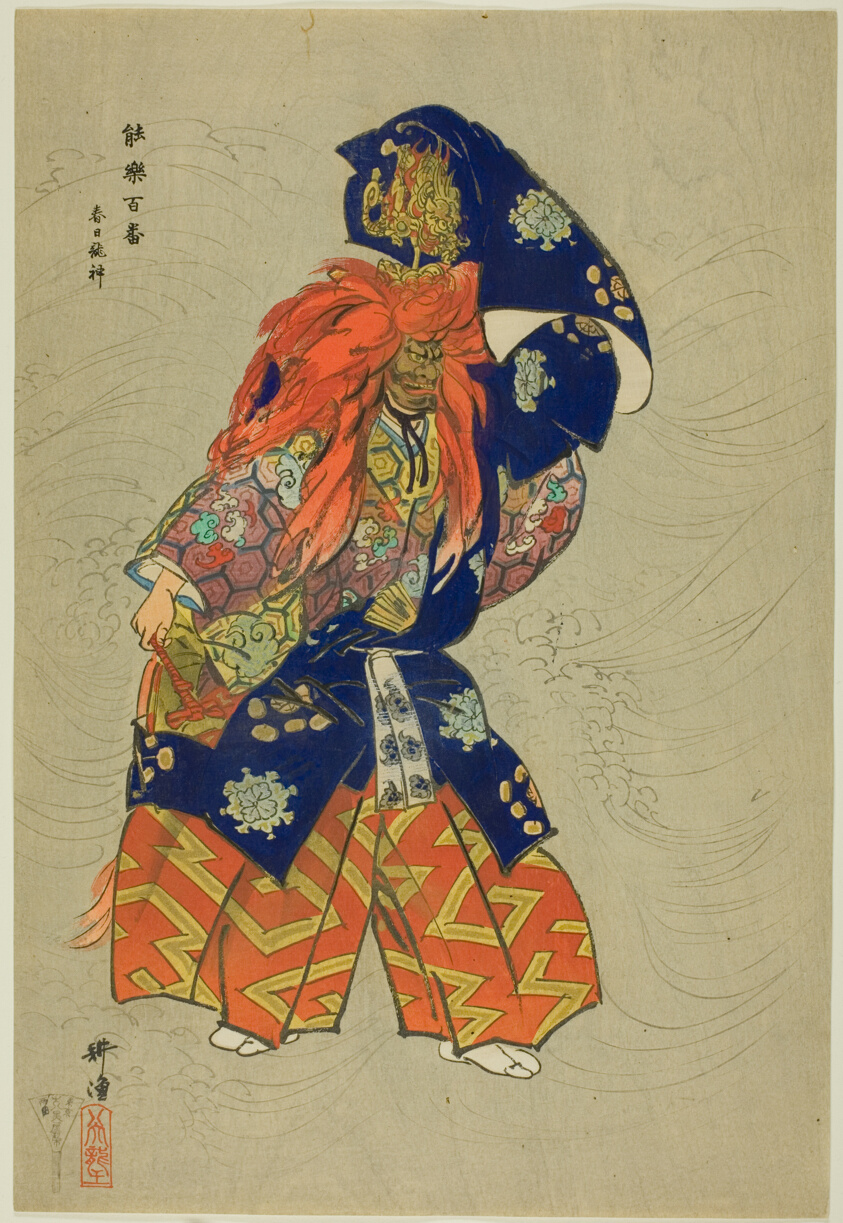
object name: Print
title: Kasuga Ryujin, from the series "One Hundred No Dramas (Nogaku hyakuban)"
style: Japanese (culture or style)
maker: Tsukioka Kogyo; Japanese, 1869-1927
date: 1898/1903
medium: Color woodblock print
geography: Japan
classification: woodblock print; print; asian art